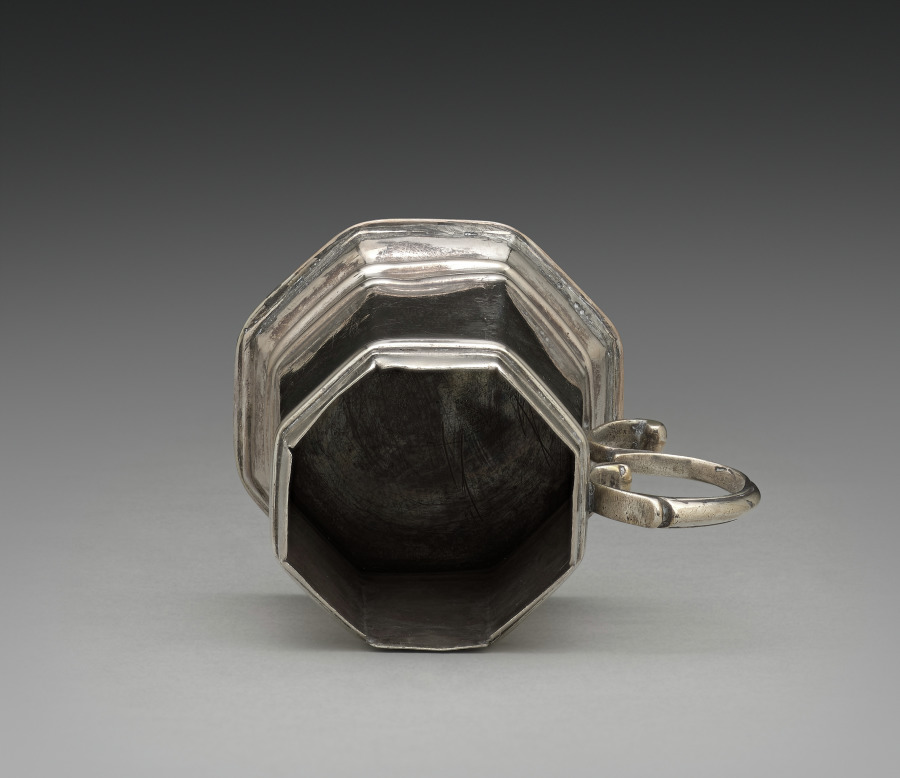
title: Caster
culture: America, Massachusetts, Boston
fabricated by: Andrew Tyler (American, 1692–1741)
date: c. 1720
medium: silver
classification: Silver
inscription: engraved: "M" over "D * L" in shaded block letters on bottom, and "AM" in block letters on front, opposite handle.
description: A caster was used to spread a finely ground substance, probably pepper.